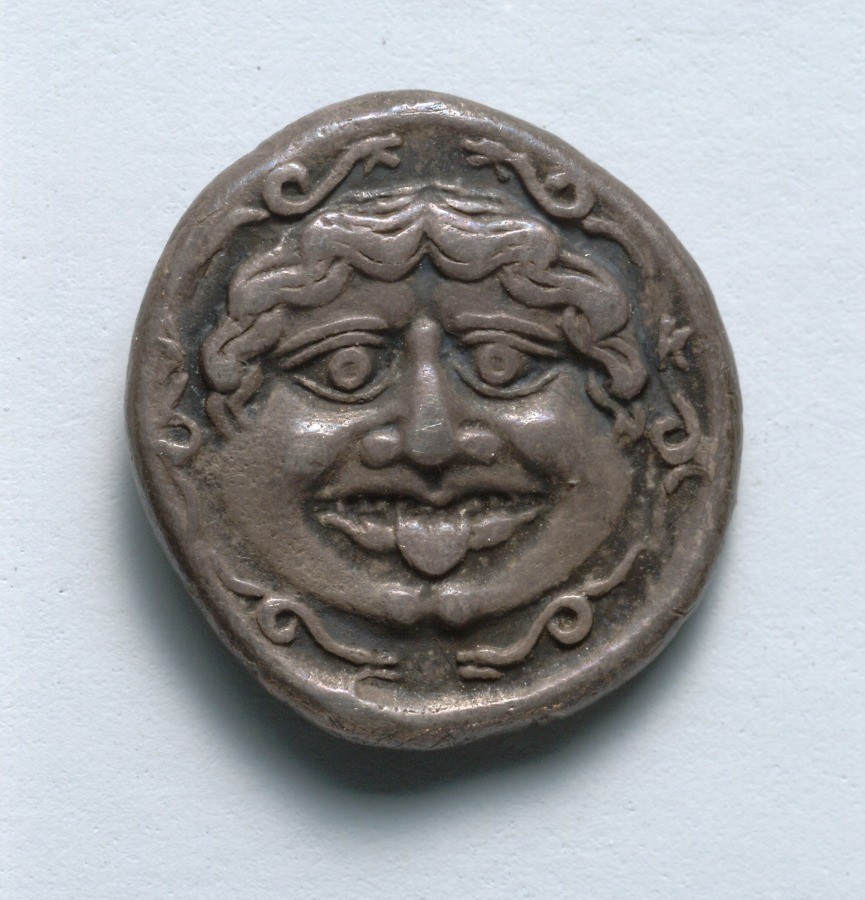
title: Hemidrachm: Gorgoneion (obverse); Bull (reverse)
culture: Greek, minted at Parion (Mysia)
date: c. 400 BCE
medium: silver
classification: Coins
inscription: [ΠΑ]ΡΙ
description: Like the coins of several other ancient cities, those of Parion feature the gorgoneion, or frontal face of Medusa, surrounded by serpents. On the reverse, a bull looks back across its body, with the letters Ρ Ι between its legs. More centrally struck examples preserve two more letters above—Π Α, to give ΠΑΡΙ (PARI), identifying the mint of Parion. The name recalls that of the Cycladic island Paros, one of Parion’s colonizers (with Miletos and Erythrae).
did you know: Ancient Parion (Latin Parium) lay in the region of Mysia, now northwest Turkey, on the Hellespont.